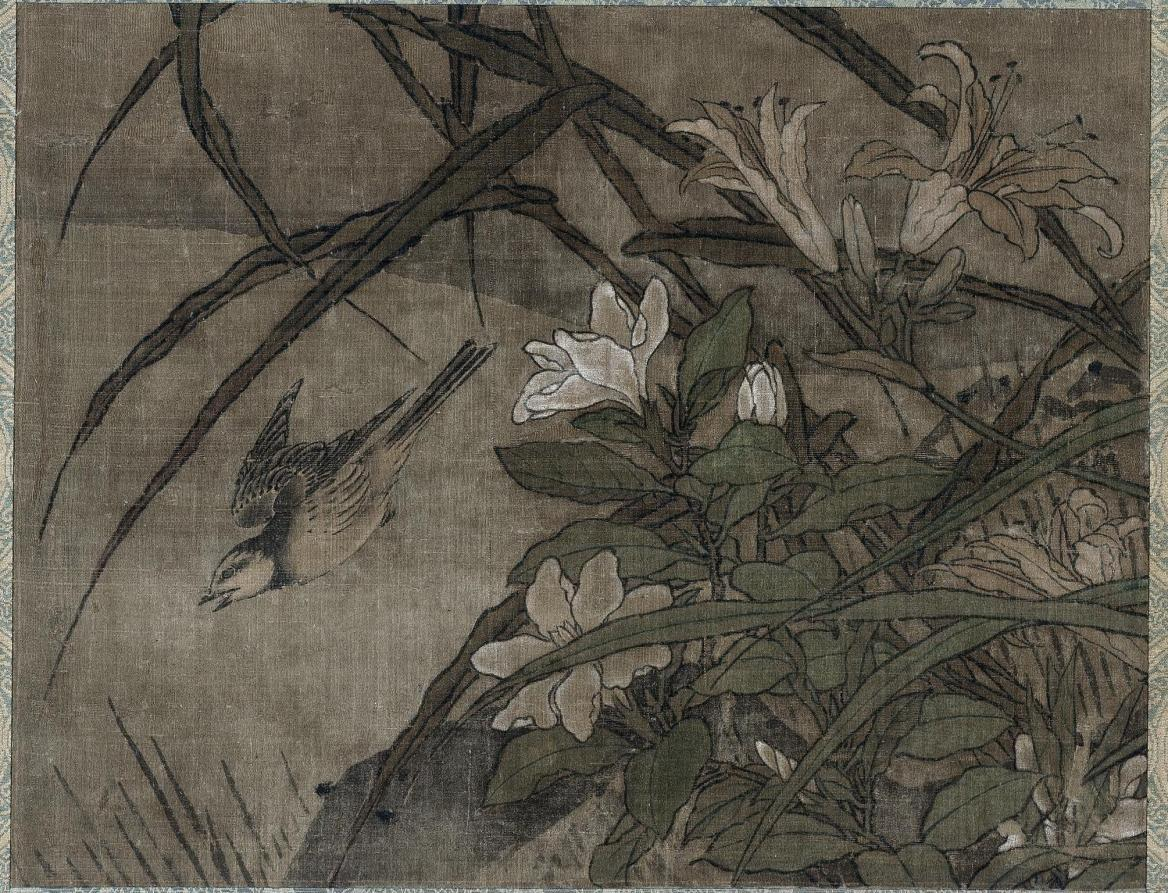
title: Birds and Flowers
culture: Japan, Muromachi period (1392–1573)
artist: attributed to Sesshū Tōyō (Japanese, 1420–1506)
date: mid-1400s-early 1500s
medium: Hanging scroll from a triptych; ink and color on silk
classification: Painting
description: This is one of two paintings possibly by Sesshū Tōyō. They once flanked a central scroll with an ink landscape. The unbalanced nature of the compositions, however, suggests they may be images recycled from larger paintings. The one with sweet osmanthus and hibiscus is an autumn scene, the other is a summer scene with daylilies and gardenias. Folding screens often contrast two seasons or depict all four across a single pair of screens. Sesshū’s works were sufficiently prized that repurposing them in fragmentary form to display in an alcove of a luxurious room would not be an unusual choice.